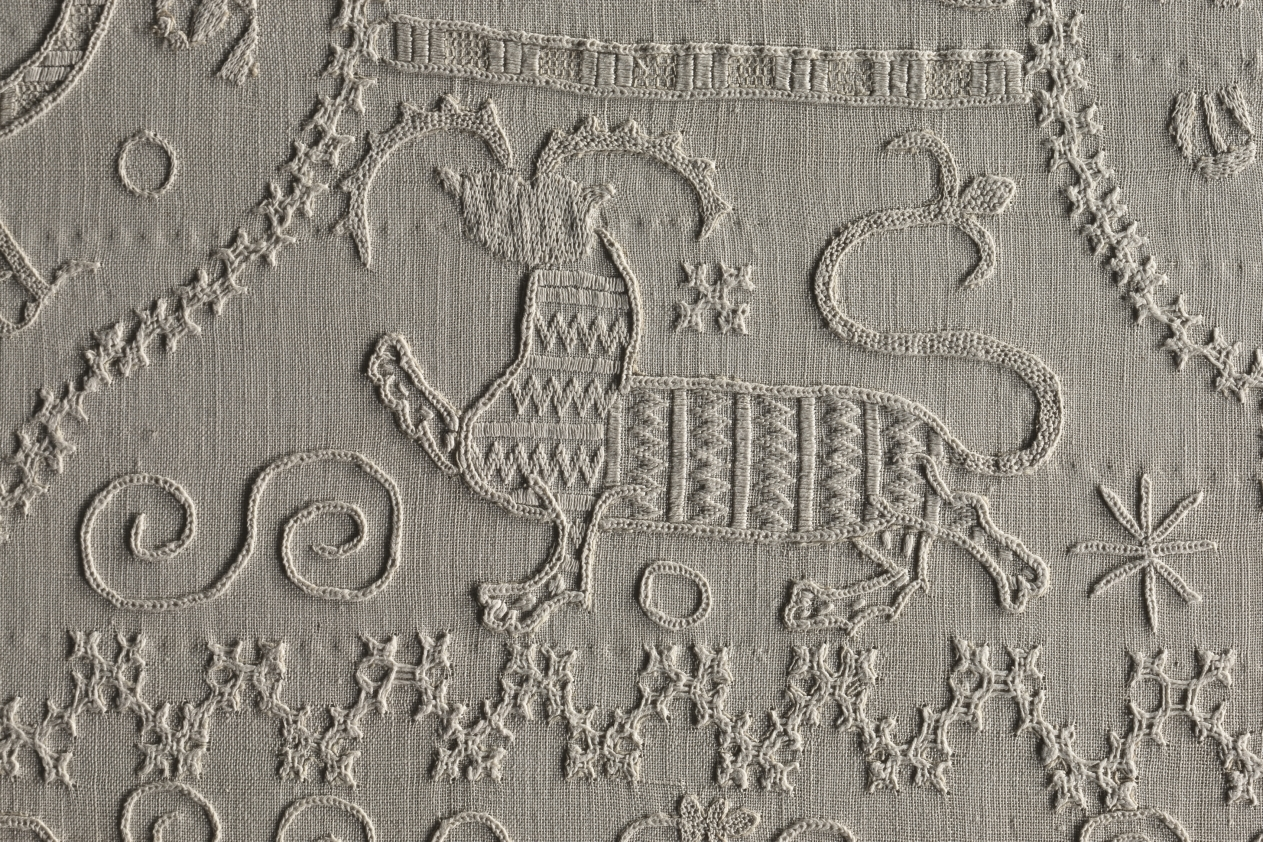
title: Altar Cloth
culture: Germany, Altenberg on the Lahn, Premonstratensian Convent, 14th century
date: c. 1350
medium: embroidery: linen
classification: Embroidery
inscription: various motifs enclosed in quatrefoils with identifying inscriptions in Gothic letters.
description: This large, embroidered altar cloth is one of the rarest, most important medieval church furnishings in existence. It was stitched by nuns in the Premonstratensian Convent in Altenberg on the Lahn River, north of Frankfurt, Germany, and was used to cover the church’s high altar in the weeks leading up to Easter. The cloth is an example of linen embroidery, a specialty of German nuns in the later Middle Ages. The Altenberg monastery church once had valuable furnishings; the high altar retable (a decorated frame with sculptures and paintings on the top of an altar) has survived, the main parts of which are now in the Städel Museum in Frankfurt, Germany.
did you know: When lit from behind, the previously hidden details emerge and the complex design becomes evident.